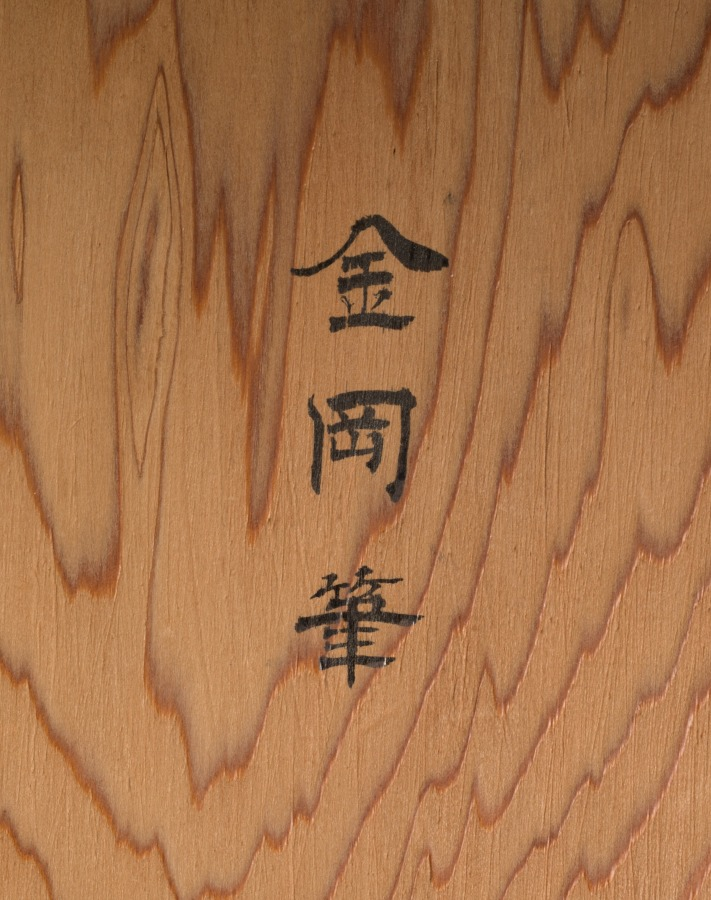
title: Monju with Five Hair Knots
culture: Japan, Kamakura period (1185–1333)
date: late 1200s–early 1300s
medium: Hanging scroll; ink, color, gold, and cut gold on silk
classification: Painting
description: This Buddhist painting shows Monju, Manjushri in Sanskrit, riding a lion. Monju is a bodhisattva, a being who, though enlightened, chooses not to become a Buddha but instead helps others achieve enlightenment. Monju’s youthfulness symbolizes his pure wisdom, unsullied by the world, and his five hair knots represent his vow to keep calamity at bay. The supernatural nature of his lion is emphasized by its hair, every strand painted in gold, as well as by the lotus platforms beneath each of its feet. The boy’s bejeweled body and silk finery is meant to resemble that of an Indian prince.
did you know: This painting is exemplary of the Kamakura period, known for artworks with special attention paid to the realism of images.